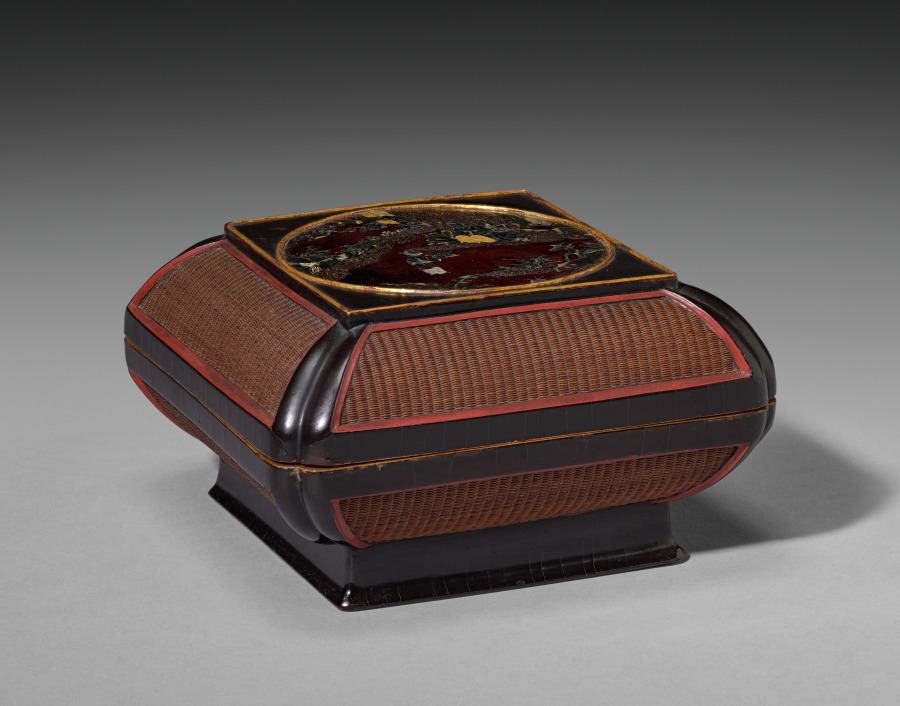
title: Wickerwork Box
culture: China, Ming dynasty (1368-1644), Wanli reign (1572-1620)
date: 1609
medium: lacquered wickerwork (of woven bamboo) framed in wood with circular scene inlaid in mother-of-pearl and gold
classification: Lacquer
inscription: Inscription at bottom in red on black lacquer reads: "commissioned by Yü-Yün-ch'i".